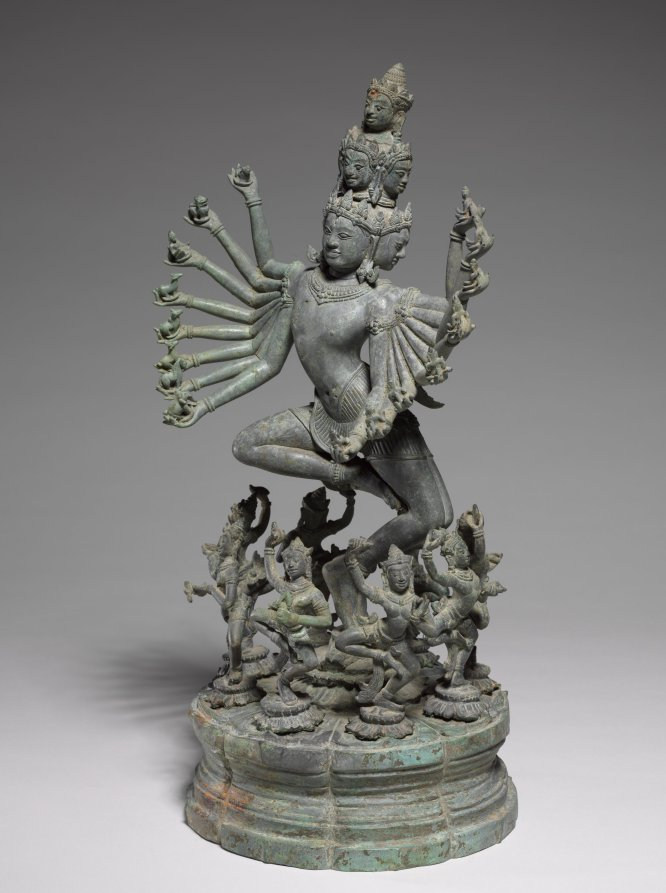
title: Hevajra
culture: Northeastern Thailand, former kingdom of Angkor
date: c. 1200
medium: Bronze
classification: Sculpture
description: Hevajra was an important figure signaling the practice of Buddhist rituals. King Jayavarman VII placed particular emphasis on Hevajra during consecration rituals and set up a colossal stone sculpture of dancing Hevajra at the east gate of his fortified city in the Khmer capital at Angkor. In the Cambodia of Jayavarman VII, tantric Buddhism became public and widespread, practiced together with other more mainstream forms of Buddhism, Hinduism, and ancestor worship. The iconography of Hevajra is described in detail in a text that bears his name, the Hevajra-tantra, first composed in India probably in the 800s. Hevajra has eight heads, sixteen arms, and four legs. His left hands hold images of Indic gods; wealth, death, sun, moon, fire, wind, water, and earth. In his right hands are animals: bull, lion, human, cat, camel, sheep, horse, and elephant. They all sit in skull cups, objects also used in tantric rituals. He dances on a corpse that embodies ignorance and is surrounded by eight yoginis who dance triumphantly in a ring around him. Yoginis functioned as intercessors between human practitioners and enlightened beings. Many bronze images of Hevajra were made during the reign of Jayavarman VII, but few survive in as pristine condition as this example. According to scientific analysis and curatorial reports, this sculpture survived in a clay vessel submerged in water, which accounts for its high tin content and unusual gray patina. Samples from the clay core reveal the presence of the mineral feldspar, a characteristic of clay from the Isaan plateau, on the other side of the mountain range not far from Banteay Chhmar, in present-day Thailand.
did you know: Hevajra, the Tantric Buddhist deity who personifies Enlightenment, dances vigorously to symbolize the human soul's liberation from the snare of existence.